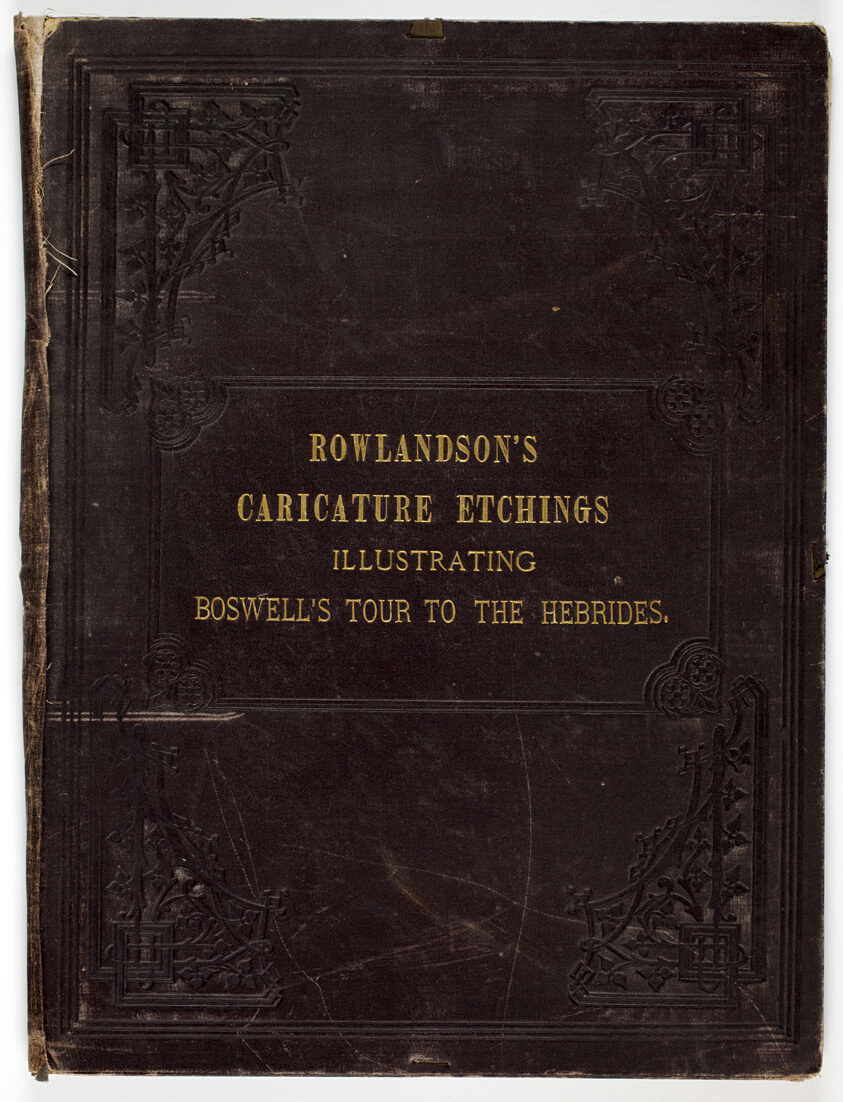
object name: Print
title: Boswell's Tour of the Hebrides: Folio Cover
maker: Thomas Rowlandson (English, 1756-1827)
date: 1786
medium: Portfolio cover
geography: England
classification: portfolio cover; print; prints and drawing; portfolio